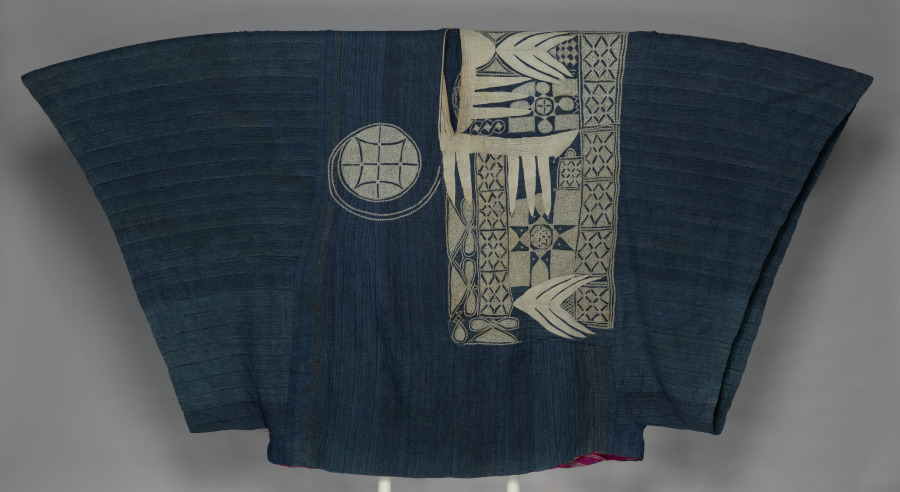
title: Prestige robe (riga)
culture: Africa, West Africa, Nigeria, probably Hausa-style or Nupe-style weavers and embroiders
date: late 1800s–by 1910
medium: Cotton, silk, and indigo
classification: Garment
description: Elite Nigerian men wore voluminous status garments variously called riga (Hausa), agbádá (Yorùbá), boubou (French), or mbubb (Wolof). Punctuated with white silk, this strip-woven riga’s inky blue was achieved by repeatedly dipping threads into indigo dye before weaving them. Embroiderers were often skilled Arabic calligraphers; the motifs here once had protective Islamic symbolism. The front pocket features the pointed “eight knives” (aska takwas) and a leaf (gambiya) associated with the Nupe peoples. At back, a spiral leads the wearer toward God. Magenta silk imported via trans-Saharan routes lines the hem. Rigan historically held transcultural appeal; today, they are pan-Nigerian male national dress.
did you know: Its owner's movements would have revealed a flash of magenta silk (an expensive trade good) along the hem of this riga, emphasizing his high status.